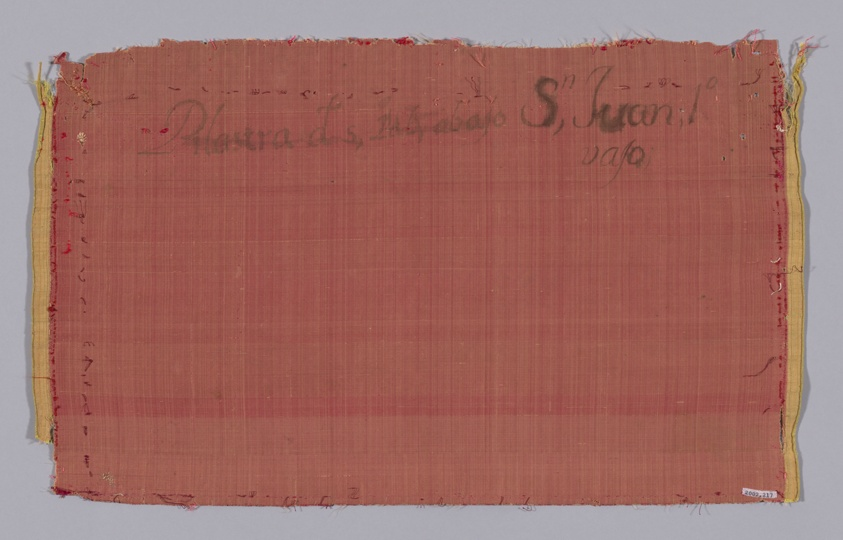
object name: Textile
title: Fragment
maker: Spain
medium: Silk, warp-float faced 3:1 broken warp chevron twill weave with supplementary pile warps forming cut solid velvet; reverse face inscribed with ink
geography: Spain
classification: textile; weaving - velvet